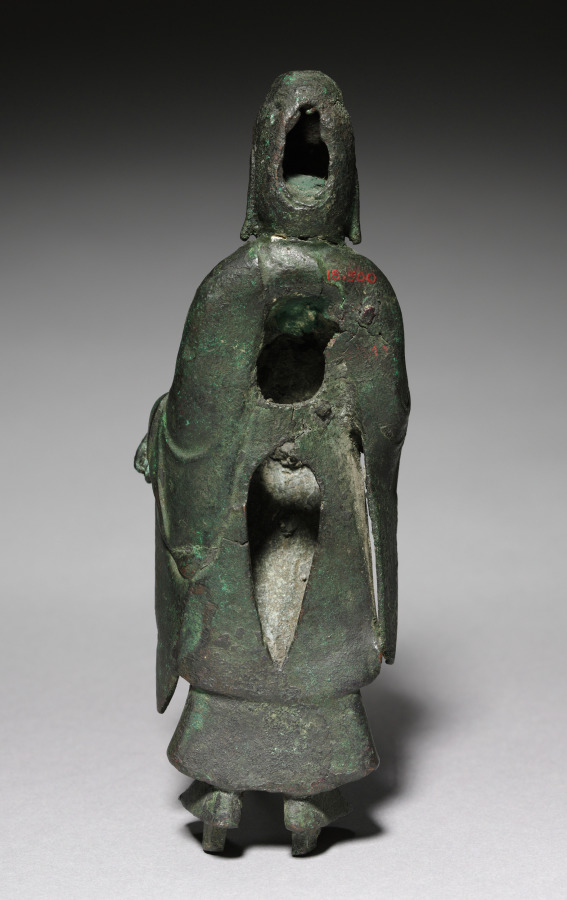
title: Standing Buddha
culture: Korea, Unified Silla period (676-935)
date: 676–935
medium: bronze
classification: Sculpture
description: This kind of miniature statue was often used as a portable object of devotion by traveling Buddhist monks.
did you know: Created during the Unified Silla period, a high point of the spread of Buddhist teachings, this kind of miniature statue was often used as a portable object of devotion by traveling Buddhist monks.